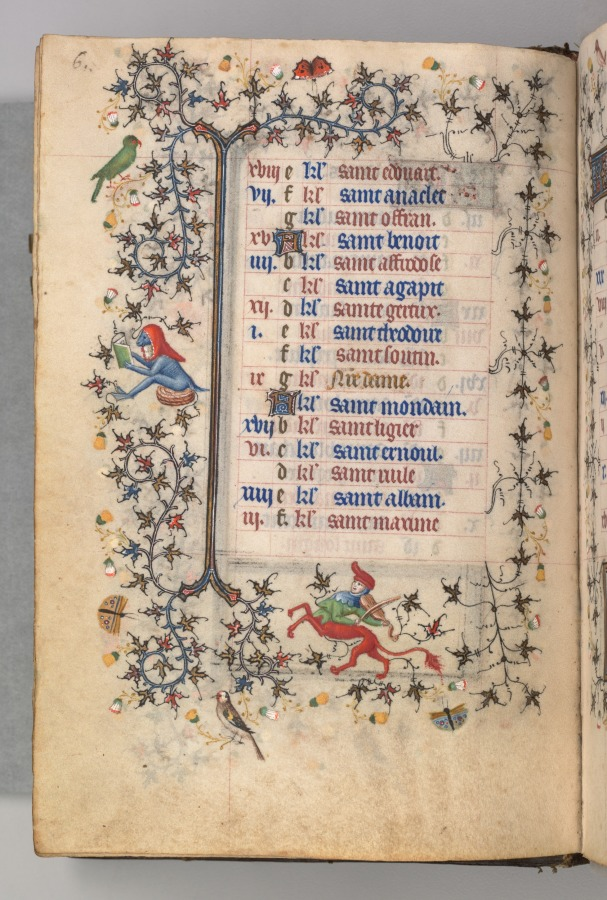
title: Hours of Charles the Noble, King of Navarre (1361-1425): fol. 3v, March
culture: France, Paris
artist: Master of the Brussels Initials and Associates (French)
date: c. 1405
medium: ink, tempera, and gold on vellum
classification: Bound Volume